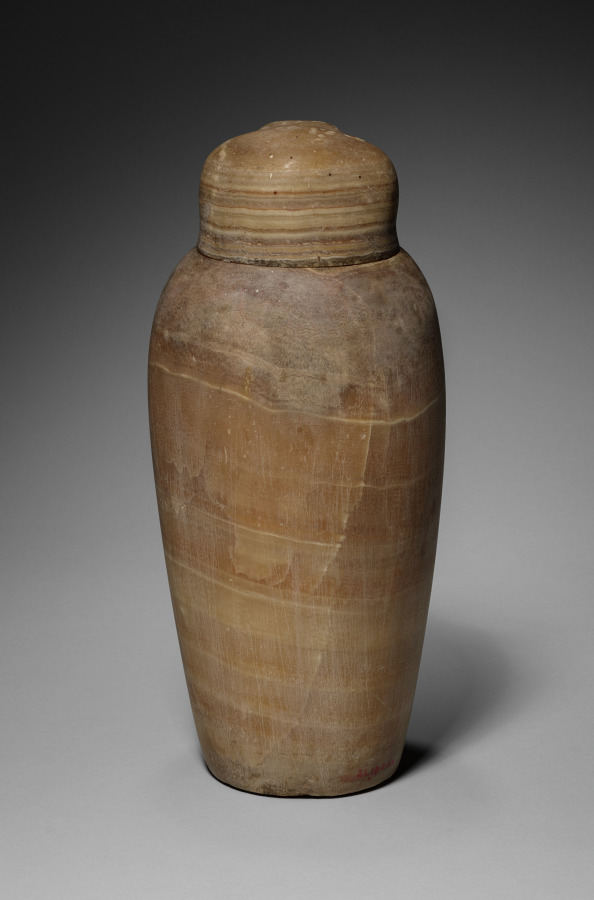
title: Canopic Jar with Baboon's Head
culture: Egypt, Late period (715–332 BCE), Dynasty 26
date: 664–525 BCE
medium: travertine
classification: Funerary Equipment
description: In the process of mummification, the liver, lungs, stomach, and intestines were removed, separately embalmed, and stored in specialized jars known as canopic jars (after a sailor in Greek mythology, who died at the town of Canopus in the Nile Delta and was worshipped there in the form of a human-headed jar). Each organ was identified with one of four funerary deities collectively known as the Sons of Horus: the liver with Imsety (man's head), the lungs with Hapy (baboon's head), the stomach with Duamutef (jackal's head), and the intestines with Qebehsenuef (falcon's head). It was their duty to protect the deceased and restore to him his body parts in the hereafter.